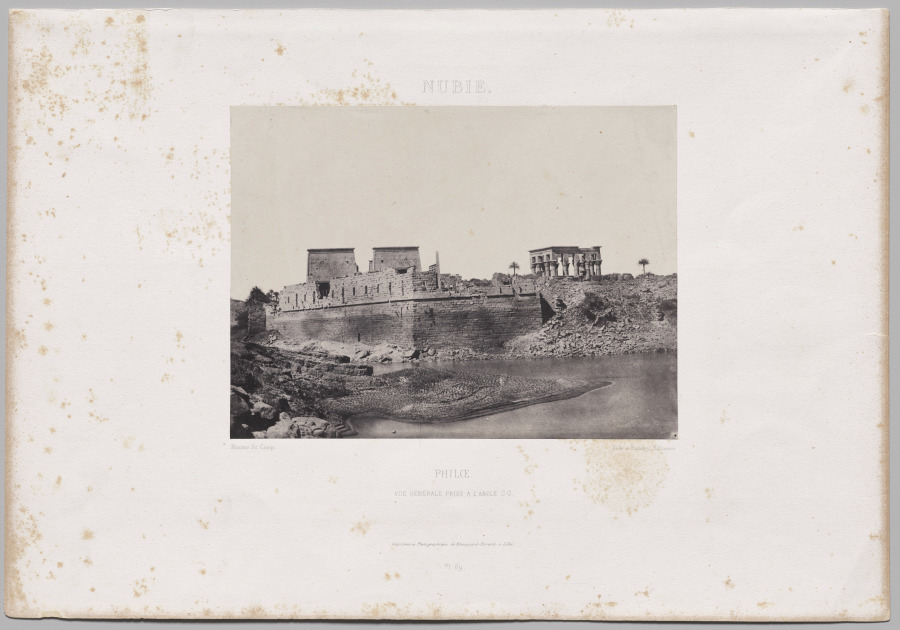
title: Vue générale prise à l'angle sud-ouest, Philoe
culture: France, 19th century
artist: Maxime Du Camp (French, 1822–1894)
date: 1849–50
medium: Salted paper print, Blanquart-Évrard process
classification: Photograph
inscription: Imprinted in black on recto of mount: “NUBIE”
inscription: Imprinted in black on recto of mount: “Maxime Du Camp Gide et Baudry, Editeurs”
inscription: Imprinted in black on recto of mount: “PHILOE/VUE GÉNÉRALE PRISE A L’ANGLE S-O”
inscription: Imprinted in black on recto of mount: “Imprimerie Photographique de Blaquard-Evard, a Lille.”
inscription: Imprinted in black on recto of mount: “Pl. 69”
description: The Temple of Isis at Philae (spelled Philoe by Du Camp) was built on an island 380–362 BC in the Nile. Following construction of the Lower Aswan Dam in 1902, it was reconstructed on a nearby island. This photograph by Du Camp is not only a picturesque image of historically significant ruins but also shows the temple as it looked when still in its original site.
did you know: Maxime Du Camp was the first photographer to depict the marvels of ancient Egypt.